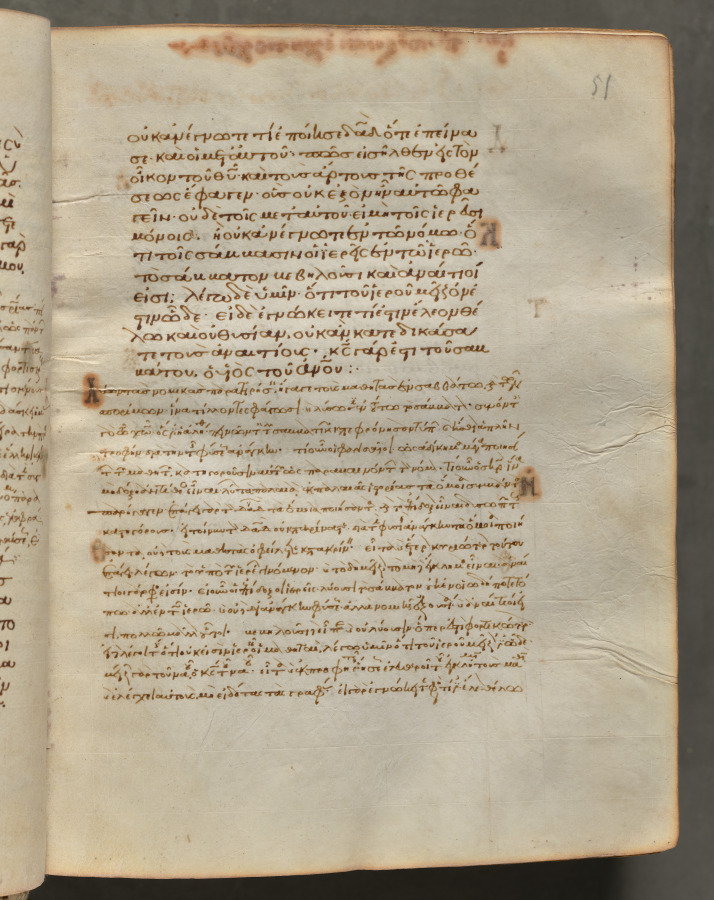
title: Text, folio 51 (recto), from a Gospel Book with Commentaries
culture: Byzantium, Constantinople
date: c. 1000–1100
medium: ink, tempera, and gold on vellum; leather binding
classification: Bound Volume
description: Each of the four gospels in this book opens on a page with brilliantly illuminated borders depicting the author of the text as well as birds-principally peacocks, symbols of the immortality of the soul-and fountains, representing the fountain of life and the salvation of the soul. This volume consists of 428 leaves with texts in Greek. Its level of sophistication suggests that it was probably written and decorated in a monastery in Constantinople.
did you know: Gospel Books were carried in procession through Byzantine churches.